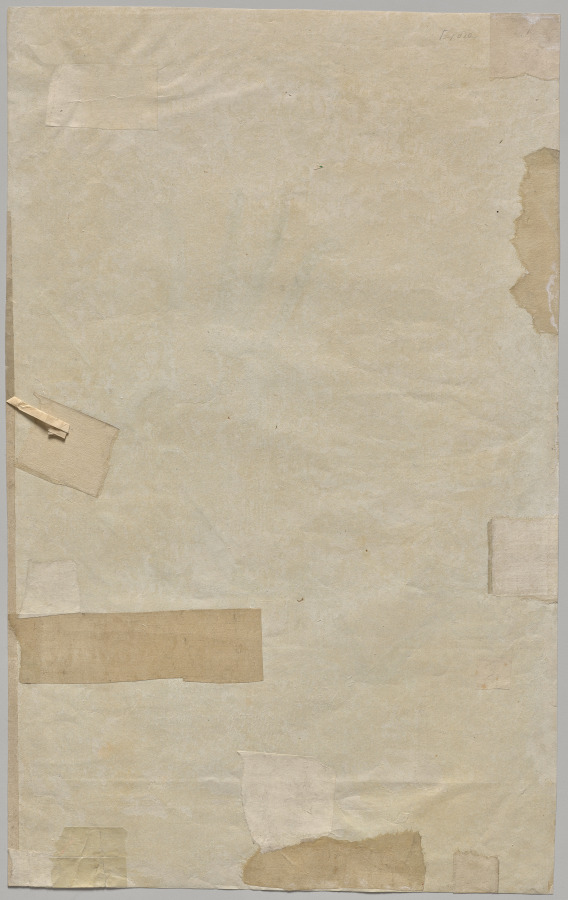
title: Two Beautiful Ladies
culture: China, Qing dynasty (1644–1911), Qianlong reign (1736–95)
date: 1736–95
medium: Polychrome woodblock print; ink and color on paper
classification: Print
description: In the 1600s, printing flourished in such Jiangnan cities as Nanjing, Suzhou, Hangzhou, and Huizhou, evolving from privately enjoyed illustrated books printed in color to more commercialized single-sheet color prints that were hung on walls and became part of the rich urban visual culture.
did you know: Woodblock printing in color reached a height in China in the 1600s to 1700s. The prints were executed by means of sets of separate blocks, each carved to print a different color.